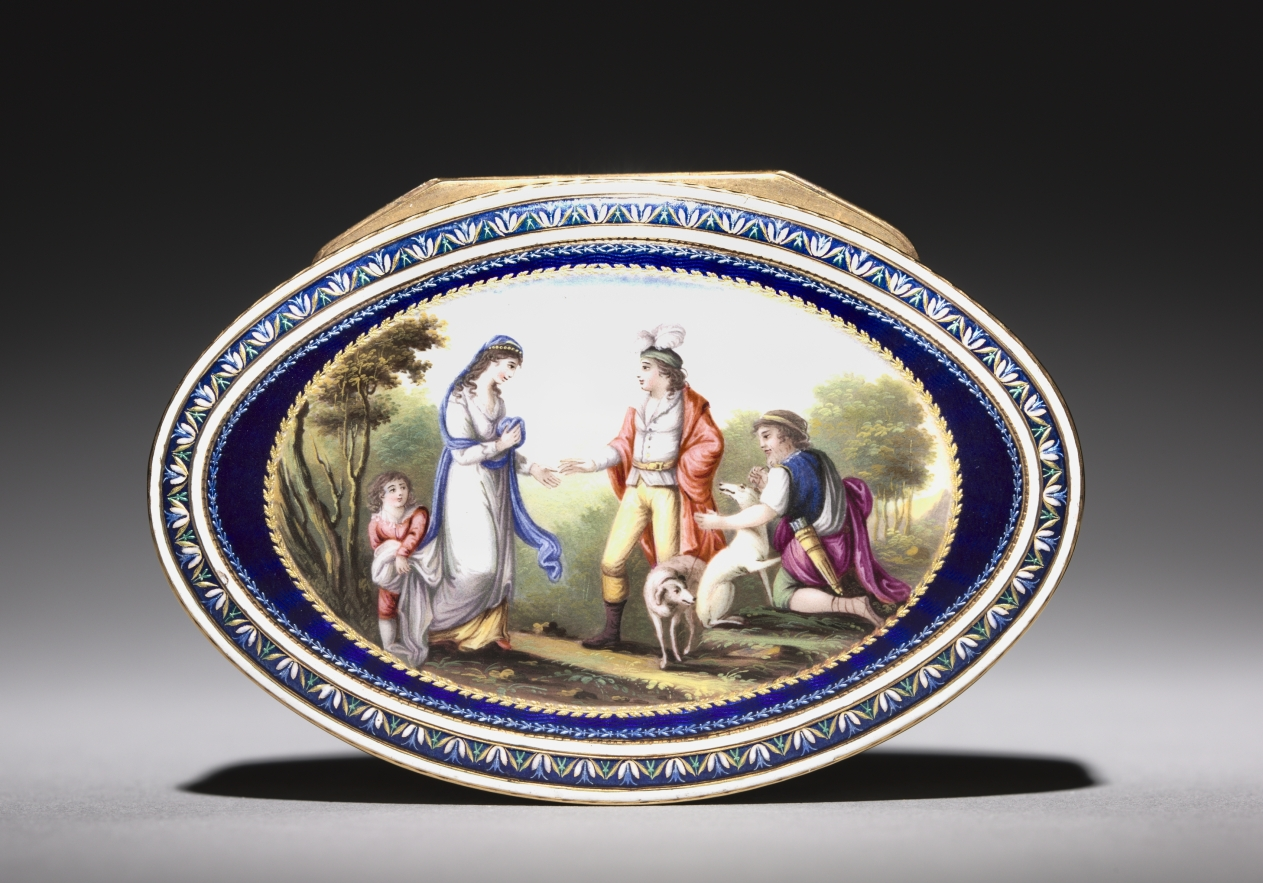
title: Box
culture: Switzerland, Geneva, late 18th Century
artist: Georges Rémond et Cie (Swiss)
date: late 1700s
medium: gold and enamel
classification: Enamel